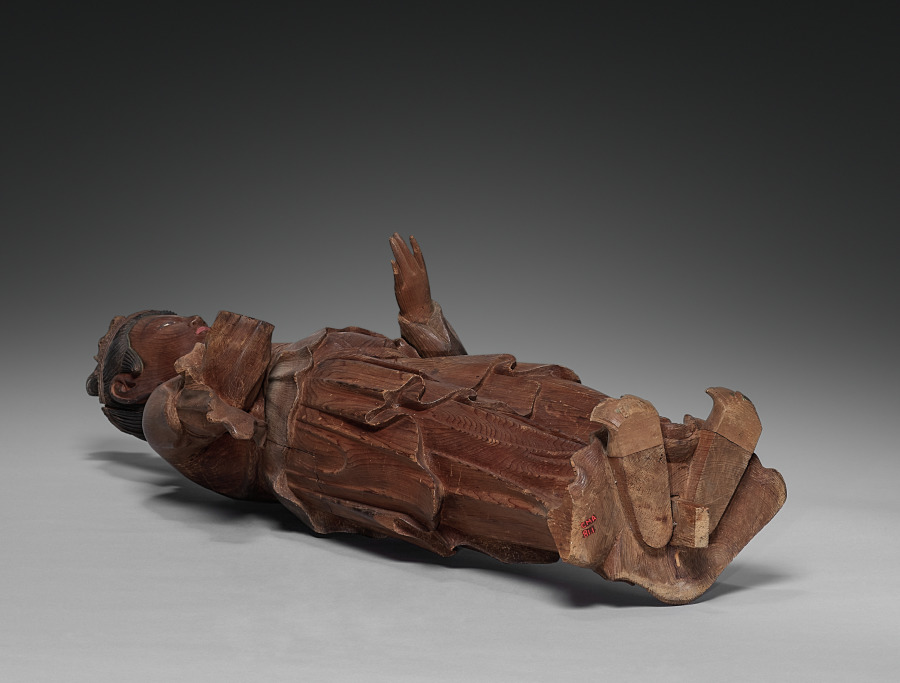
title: Batō (Horse-Headed) Kannon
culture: Japan, Kamakura period (1185–1333)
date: early 1300s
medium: Wood with traces of color and gold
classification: Sculpture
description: Batō Kannon, or Hayagriva Avalokiteshvara in Sanskrit, is the “horse-headed” form of the bodhisattva of compassion, who presides over the realm of animals in the Buddhist Six Realms of Transmigration (rebirth). A horse’s head appears in the hair of this sculpture to identify it. Bodhisattvas are beings who, though enlightened, choose to remain within the worlds of existence to help others. The six realms are heaven, hell, human, animal, hungry ghost, and ashura, or fierce supernatural entities.